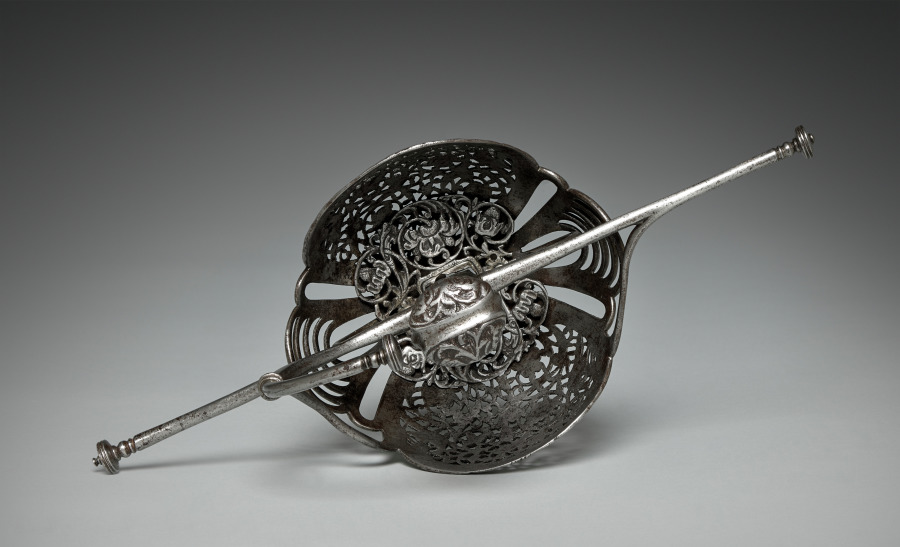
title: Rapier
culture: Spain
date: c. 1650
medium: steel, pierced and chiseled, leather and wood grip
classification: Arms and Armor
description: The rapier was a sword worn with civilian dress and used in duels. The term rapier derives from a 16th-century French word rapière, which in turn derived from the Spanish espada ropera, or “dress sword.” The rapier was a light weapon with a straight double-edged and pointed blade that, with the development of the art of fencing in the 1500s and 1600s, gradually became narrower and lighter, and thus suitable for thrusts only. With the new technique of swordplay emphasizing the point of the blade, sword guards became more complex to protect the duelist’s unarmored hand. These elaborate guards were frequently decorated by various techniques—chiseling, bluing, russeting, and damascening.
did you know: Many civilians wore swords for self defense and for settling disputes by dueling; the swords often reflected contemporary taste and fashion.